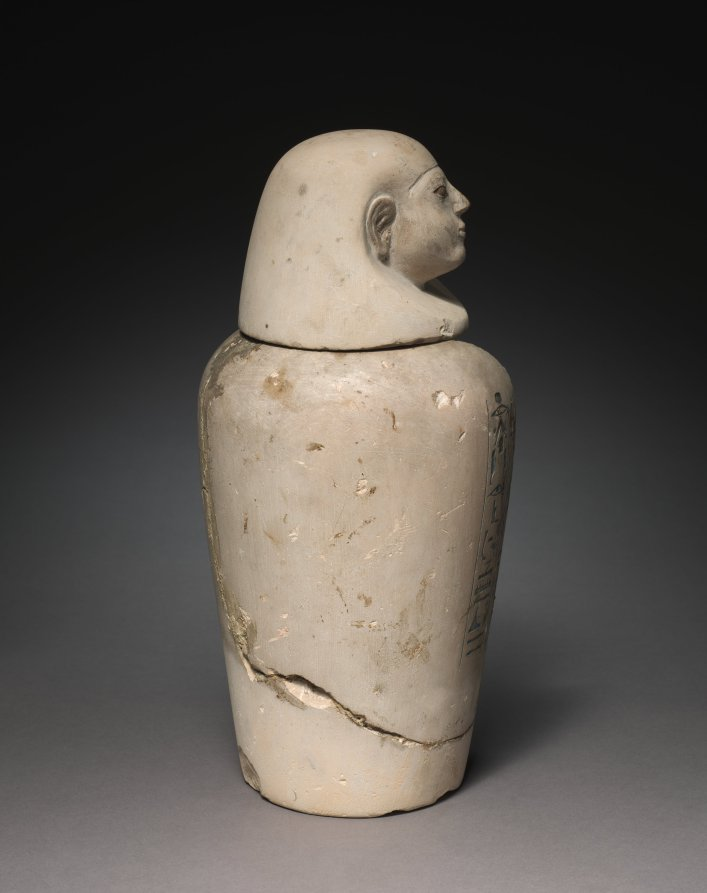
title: Canopic Jar with Lid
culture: Egypt, New Kingdom (1540–1069 BCE), Dynasty 18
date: 1540–1296 BCE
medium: limestone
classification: Funerary Equipment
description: In the process of mummification certain organs, the liver, lungs, stomach, and intestines, were removed, embalmed separately , and stored in jars known as canopic jars. Although this jar and another from the collection (1914.630) were presumably from the same individual and therefore the same set, they differ in their materials, workmanship, size, and style of inscriptions. Made of a different limestone this jar, the smaller of the two, has a lid in the form of a rather ludicrous male head. It is clearly by another hand. A sizable fragment is lost from the body. IN contrast to the poor quality of the head, the handsome inscription on the body is deeply cut and filled in with a blue pigment. It reads, "[Words spoken by Nephathys:] 'May your arms embrace that which is in you. May you protect Hapy, who is in you, and the honored one before Hapy, the Osiris, the royal herald, Gregmennefer, vindicated."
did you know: Canopic jars are named after the Greek sailor Canopus, who was said to be buried at Canopus (Abuqir) in the western delta and worshipped there in the form of a human-headed jar. It was actually a form of Osiris and had nothing to do with internal organs, but the term has stuck.